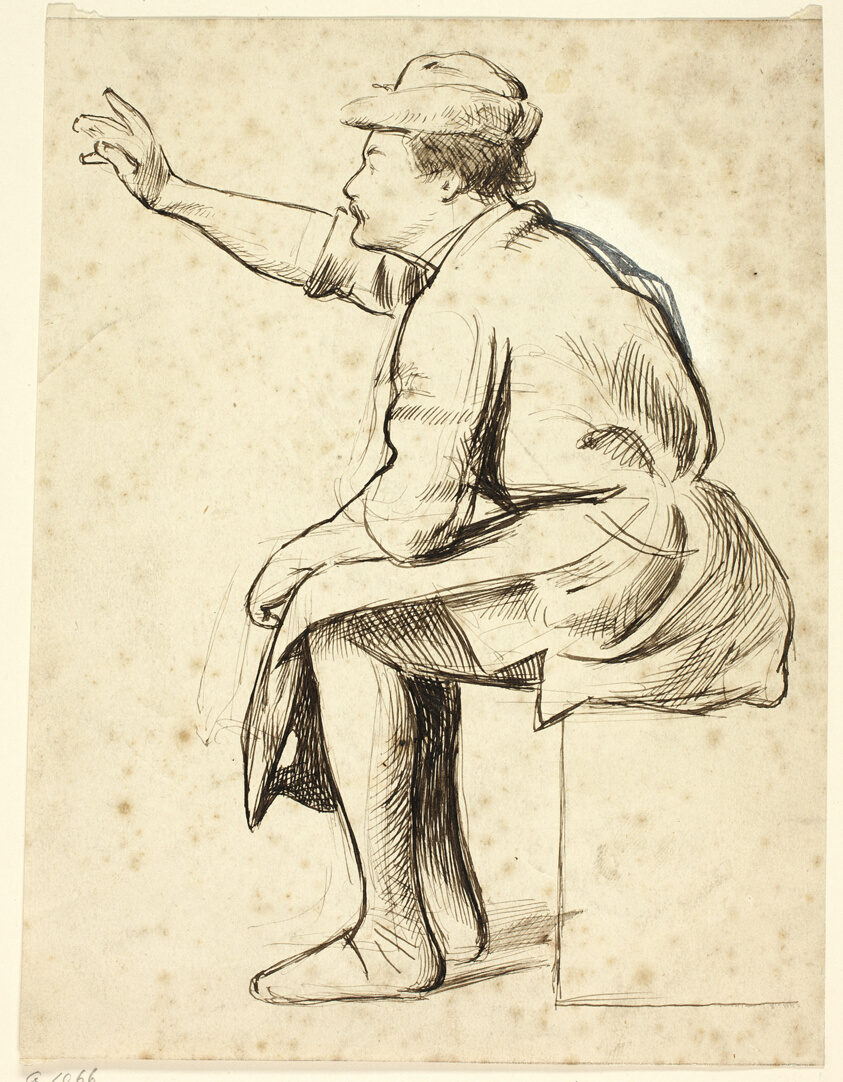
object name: Drawing and Watercolor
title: Seated Man with Raised Arm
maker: Henry Stacy Marks (English, 1829-1898)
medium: Pen and brown ink on cream wove paper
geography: England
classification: pen and ink drawings; drawings (visual works); prints and drawing